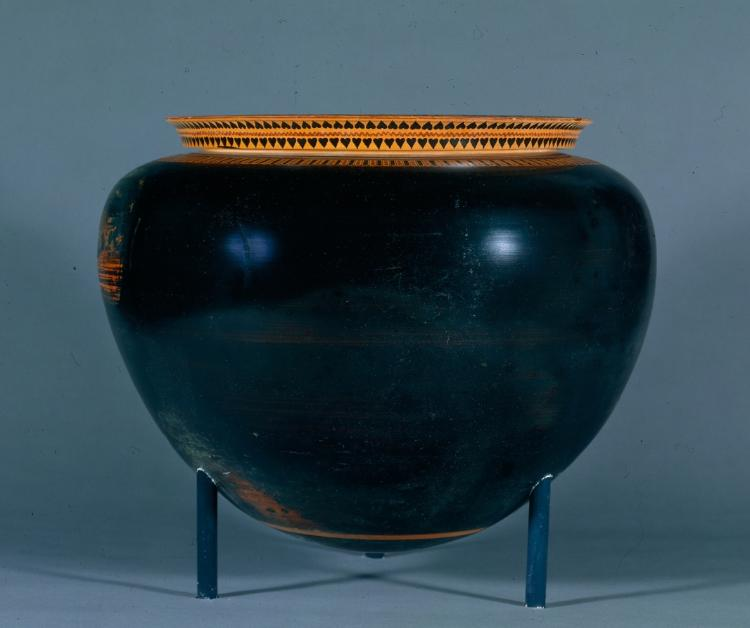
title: Black-Figure Dinos (Mixing Vessel): Warships (Int.); Heroic Scenes (Top)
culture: Greek, Attic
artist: circle of Antimenes Painter (Greek, Attic, active c. 530–510 BCE)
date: c. 520–515 BCE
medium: ceramic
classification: Ceramic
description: Designed for use at a symposium, or drinking party, this large dinos has a wide mouth allowing easy access to its contents—wine mixed with water (and sometimes other ingredients for flavoring). While drinking, symposiasts would often recite poetry and celebrate the mythological exploits of gods and heroes, perhaps prompted by the images painted on their pottery. Here, the vase-painter clearly anticipated such use; when the vessel was full, the ships painted on the inside of the rim would appear to sail across the “wine-dark sea” (to borrow a phrase found frequently in Homer’s Iliad and Odyssey). Other heroic scenes, including Herakles wrestling the Nemean lion and Theseus battling the Minotaur, appear on top of the rim, interspersed with chariots and anonymous combats.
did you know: Unable to stand on its own, this round-bottomed vessel probably once had a separately made base.